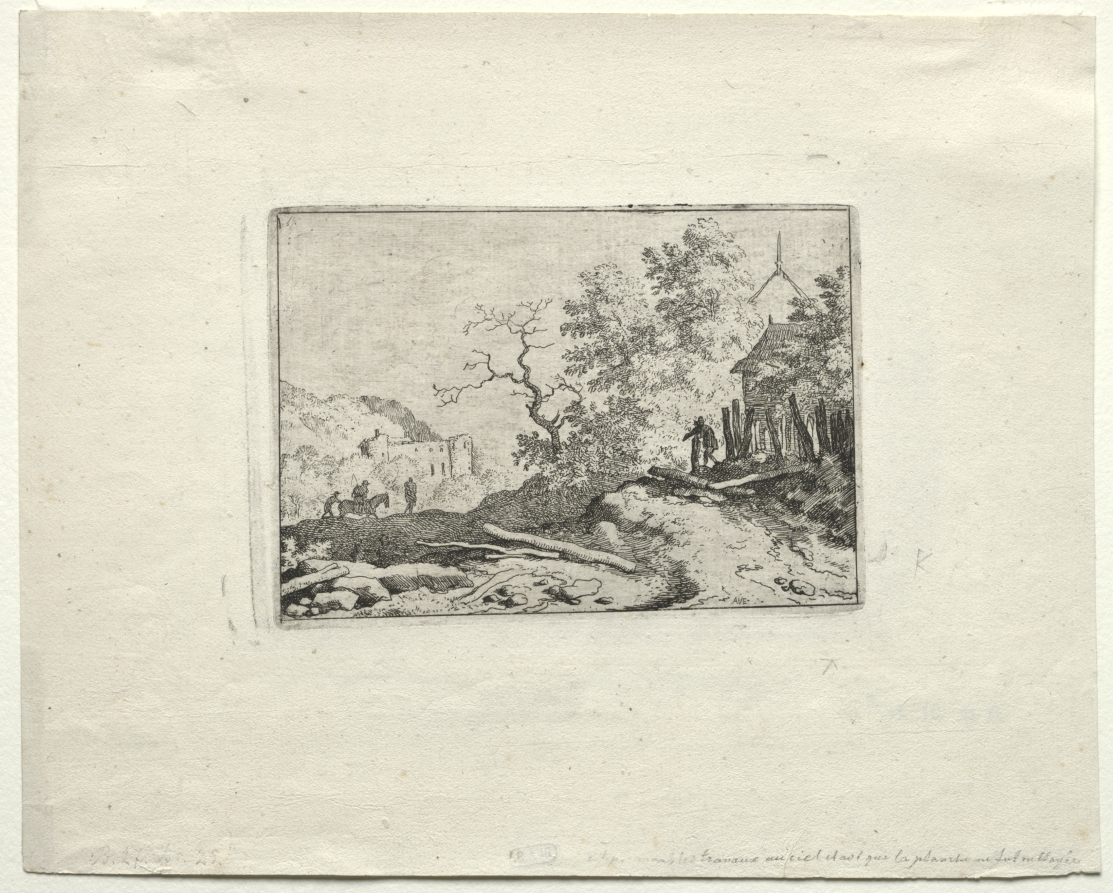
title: The Hut with the Rustic Fence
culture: Netherlands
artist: Allart van Everdingen (Dutch, 1621–1675)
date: 1636–75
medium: etching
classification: Print